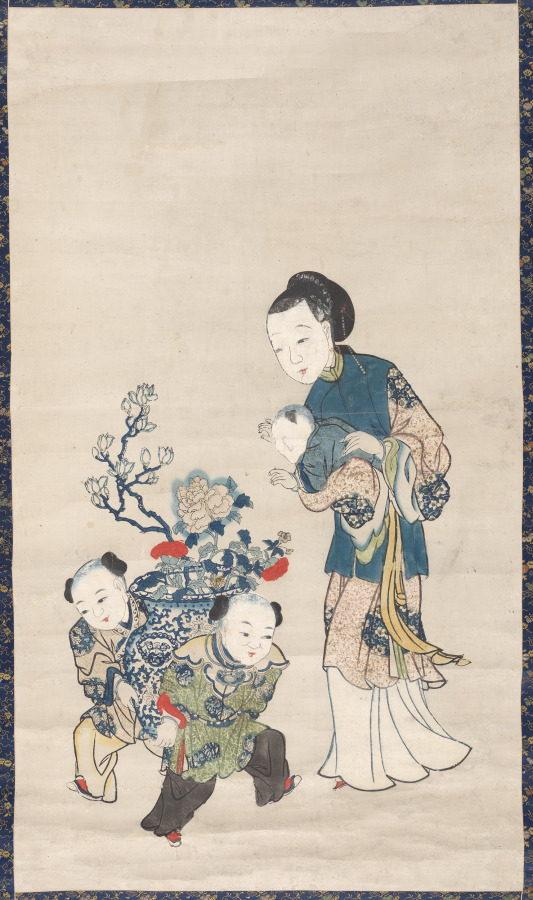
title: Mother and Sons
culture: China, Qing dynasty (1644–1911), Qianlong reign (1736–95)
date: 1736–95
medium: Hanging scroll; polychrome woodblock print; ink and color on paper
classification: Print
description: Woodblock printing in color reached its height in China in the 1600s to 1700s. It was executed by means of sets of separate blocks, each carved to print a different color.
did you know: In the 1600s, printing flourished in such Jiangnan cities as Nanjing, Suzhou, Hangzhou, and Huizhou, evolving from privately enjoyed illustrated books printed in color to more commercialized single-sheet color prints that were hung on walls and became part of the rich urban visual culture.